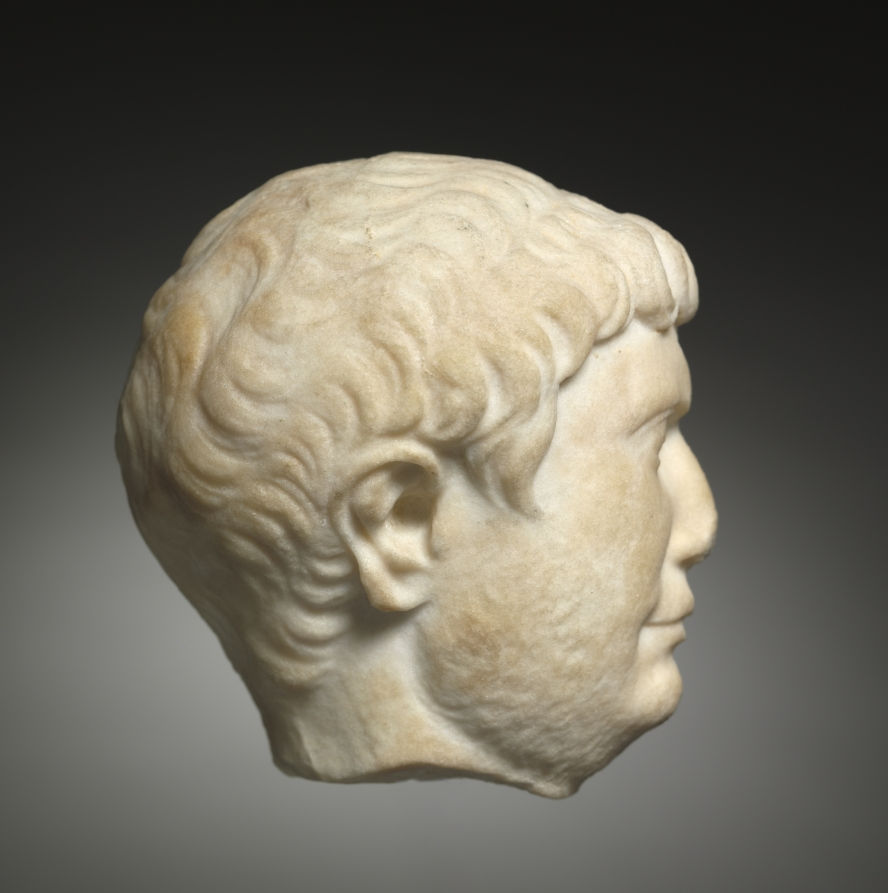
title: Head of Trajan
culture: Italy, Roman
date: 100–200 CE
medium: marble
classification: Sculpture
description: Though this portrait head has many of the features associated with the emperor Trajan, such as his short, comma-shaped forelocks, other aspects of the statue are unusual. For example, all other known portraits of Trajan depict him as clean shaven, but this one appears to have facial hair. Provincial portraits—that is, those made outside of Italy—could sometimes differ dramatically from imperial standards. This head may be an example of provincial experimentation.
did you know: Drilled pupils only began appearing on Roman portrait statues after Trajan’s death in 117 CE; their appearance here could be a later addition.